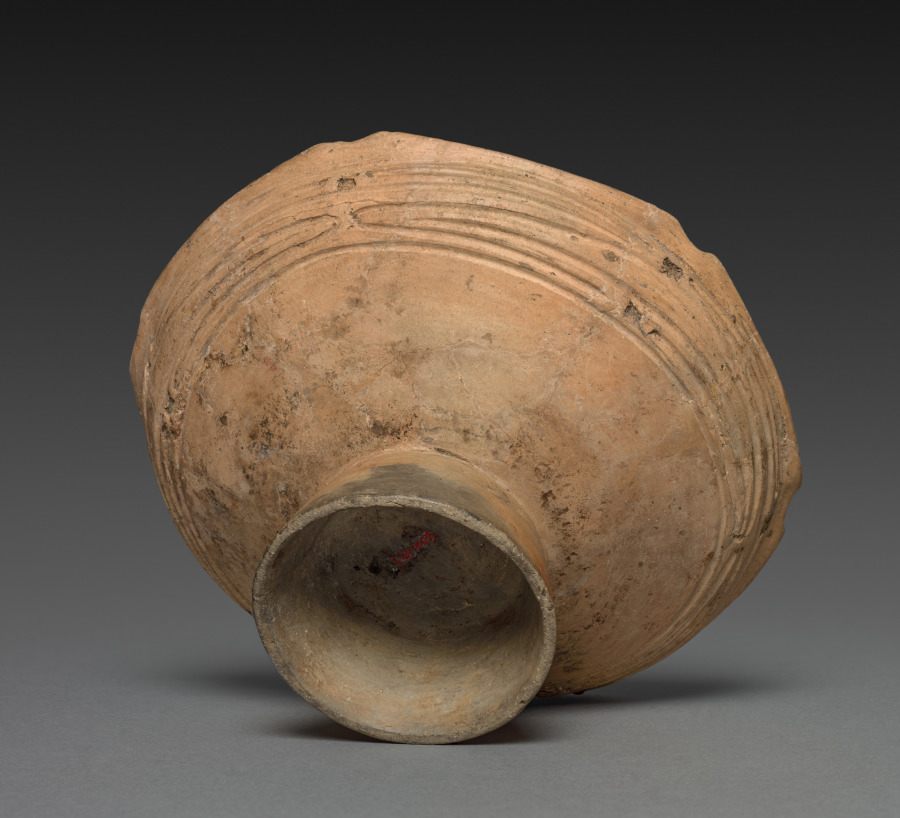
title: Pedestalled Dish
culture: Japan, Jōmon period (c. 10,500–300 BCE)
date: c. 1000–500 BCE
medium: burnished earthenware with carved and impressed decoration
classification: Ceramic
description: The Jomon period (10,500-300 BC) marks the beginning of the Japanese ceramic tradition, one of the most vibrant in world history. Major features such as an emphasis on asymmetrical silhouettes, great attention to surface texture, technological simplicity, and ambivalence to bright color already appear in this era. Late Jomon vessels are typically formed of a dense clay paste, and during this period, smaller serving vessels appear, in contrast to earlier deep storage or cooking vessel shapes. New types of surface decoration-carved rather than impressed into the clay body-herald the arrival of a distinctive aesthetic. The attachment of the pedestal to this shallow bowl, as well as the vessel's rather thin walls, also identify a new stage in ceramic production in Japan.